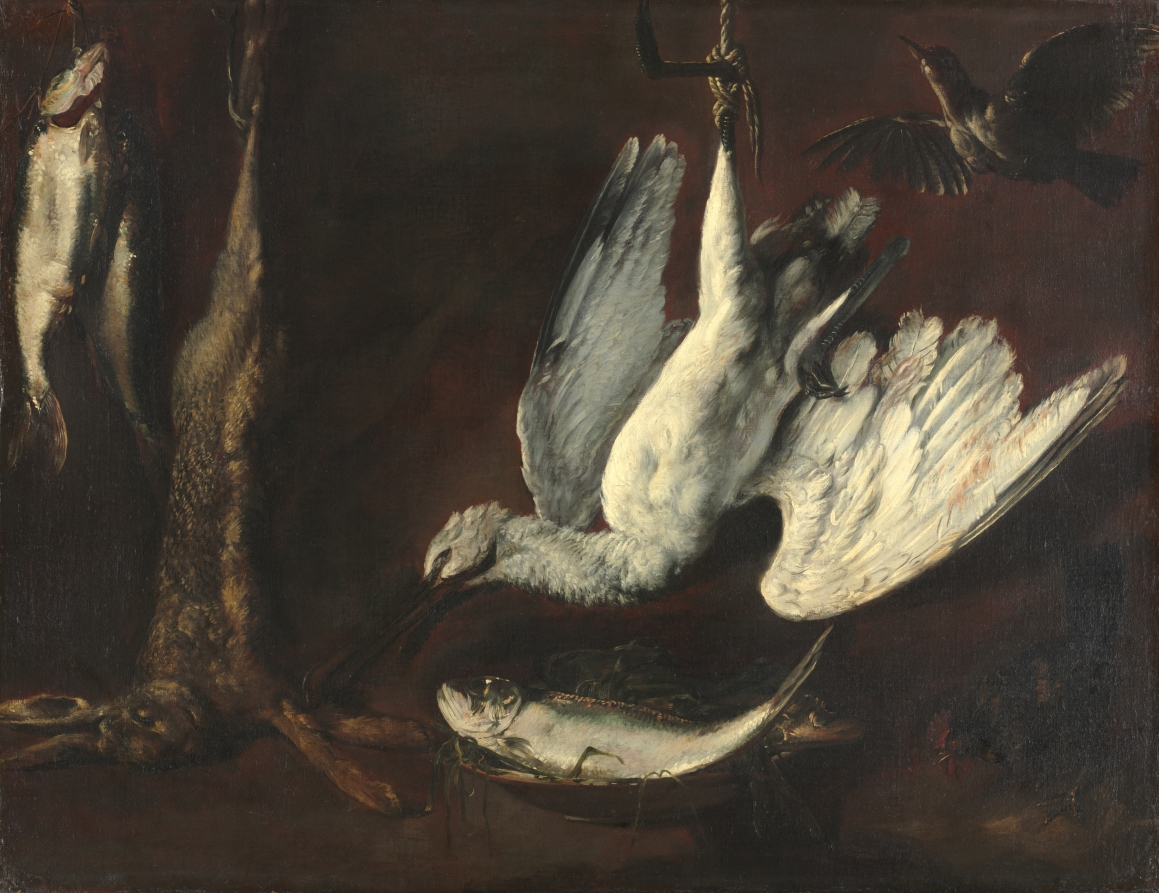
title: Hare, Spoonbill, and Fish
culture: Italy, possibly Genoa, 17th century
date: mid-1600s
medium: oil on canvas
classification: Painting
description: This striking painting of fish and game has yet to be attributed to a specific artist. Art historians have considered Dutch, Spanish, or Italian artists as possibilities, including the Dutch still-life and animal specialist Frans Snyders and the Spanish artist Alejandro de Loarte. But both have been rejected on stylistic grounds. An Italian artist is more plausible; the vaguely rendered, reddish background and the fluid handling of paint, especially in the portrayal of the fish, are characteristic of an Italian hand. The composition, which emphasizes the space between the creatures with strong highlights and deep shadows, also points to an Italian artist, possibly from a Northern Italian city such as Genoa.